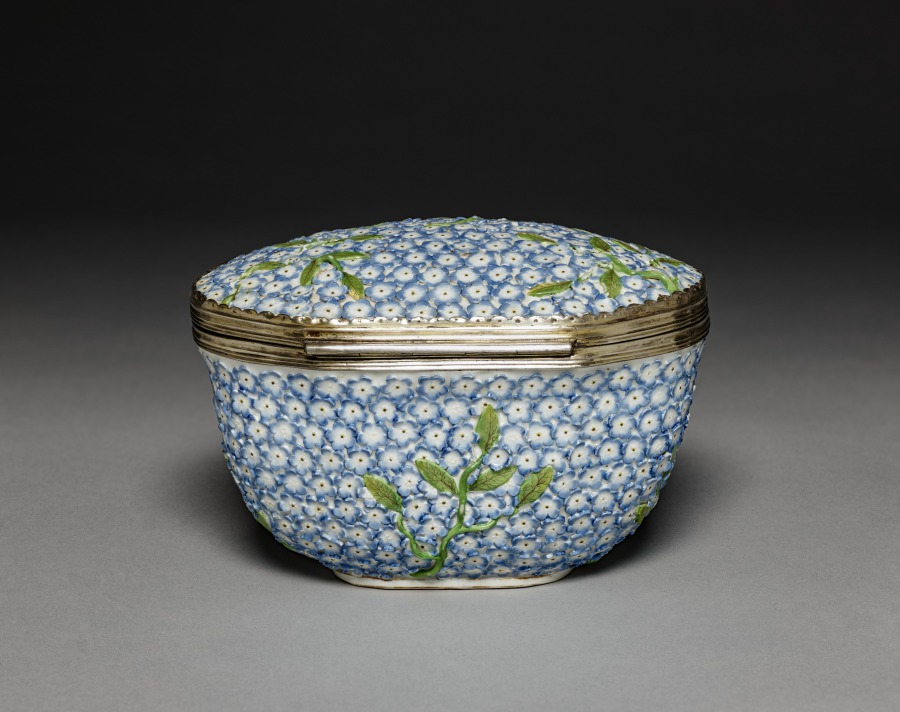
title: Covered Box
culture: Germany, Meissen, 18th century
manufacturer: Meissen Porcelain Factory (German, est. c. 1710)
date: c. 1750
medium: porcelain mounted in silver with traces of gilding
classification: Ceramic